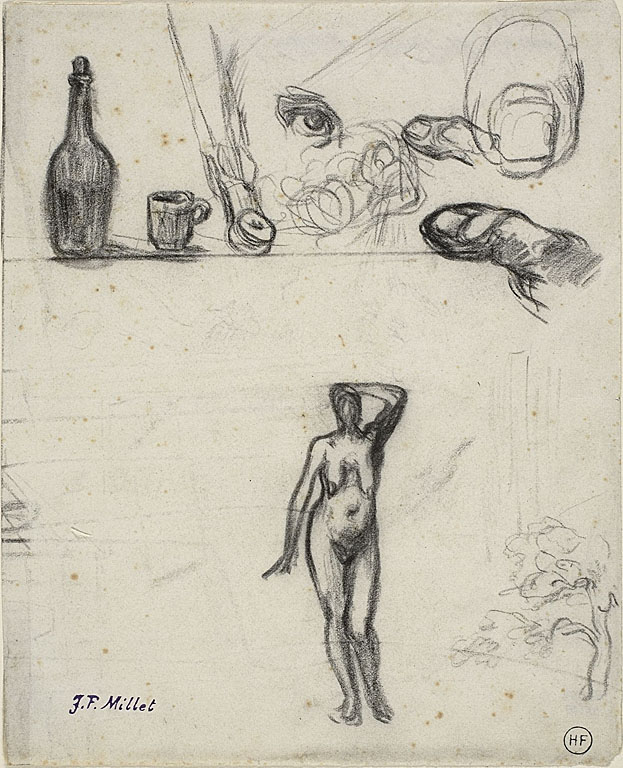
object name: Drawing and Watercolor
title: Sheet of Sketches: Standing Female Nude, Tree, Still Life, Fingers and Eye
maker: Jean François Millet (French, 1814-1875)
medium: Charcoal, on ivory wove paper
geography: France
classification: charcoal; drawings (visual works); prints and drawing